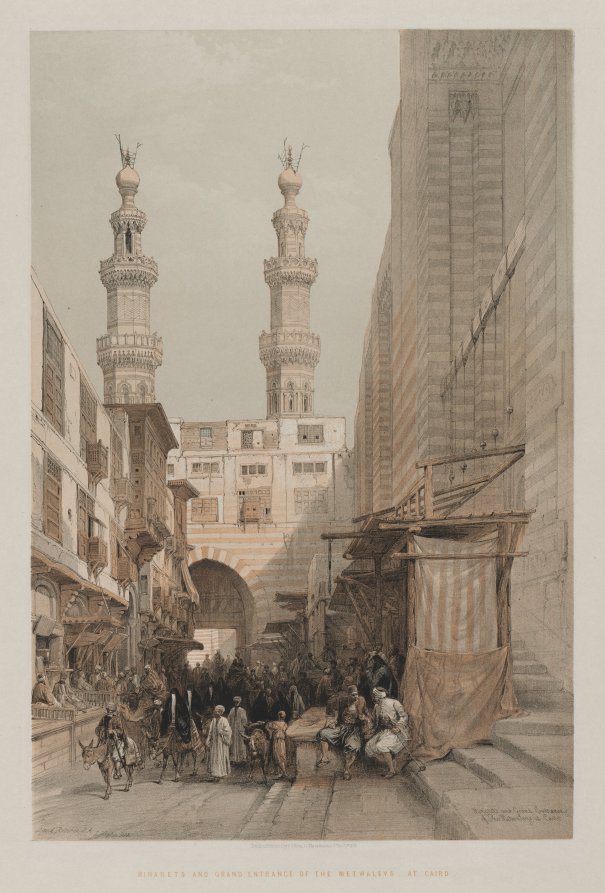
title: Egypt and Nubia, Volume III: Minarets, and Grand Entrance of the Metwaleys, at Cairo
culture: England, 19th century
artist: Louis Haghe (British, 1806–1885)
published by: F. G. Moon, 20 Threadneedle Street, London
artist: after David Roberts (Scottish, 1796–1864)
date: 1848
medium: color lithograph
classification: Print